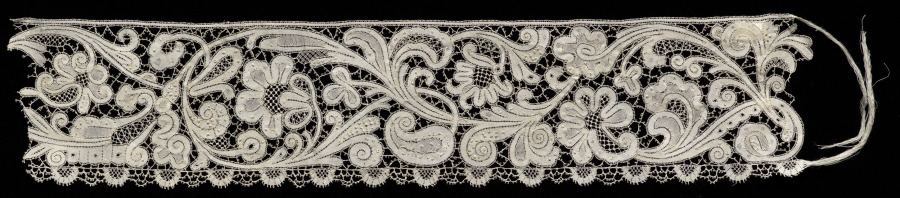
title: Lace Edging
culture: Unassigned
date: 1900–1935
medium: Linen: bobbin lace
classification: Lace